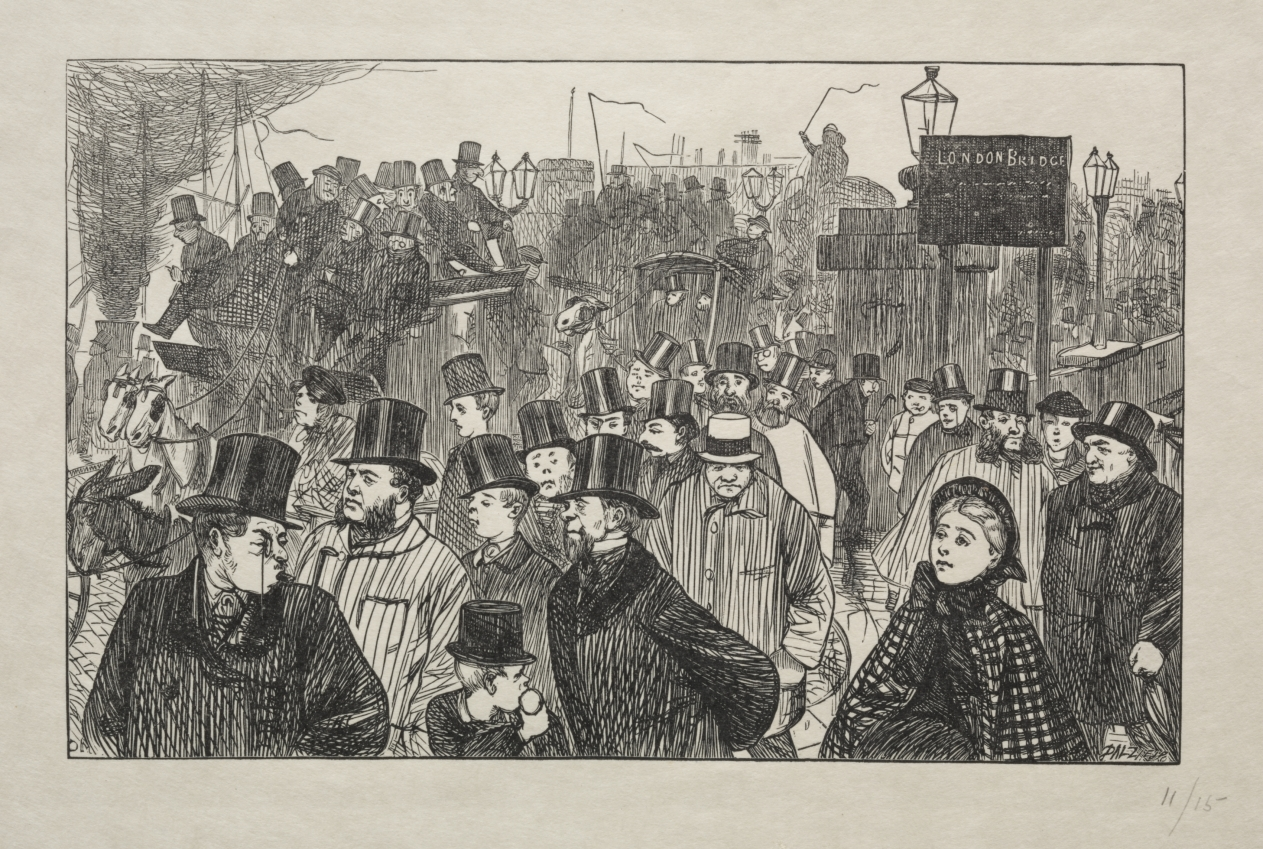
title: The Living Stream at London Bridge - On the Bridge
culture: England, 19th century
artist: George Louis Palmella Busson Du Maurier (British, 1834–1896)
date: 1863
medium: wood engraving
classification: Print